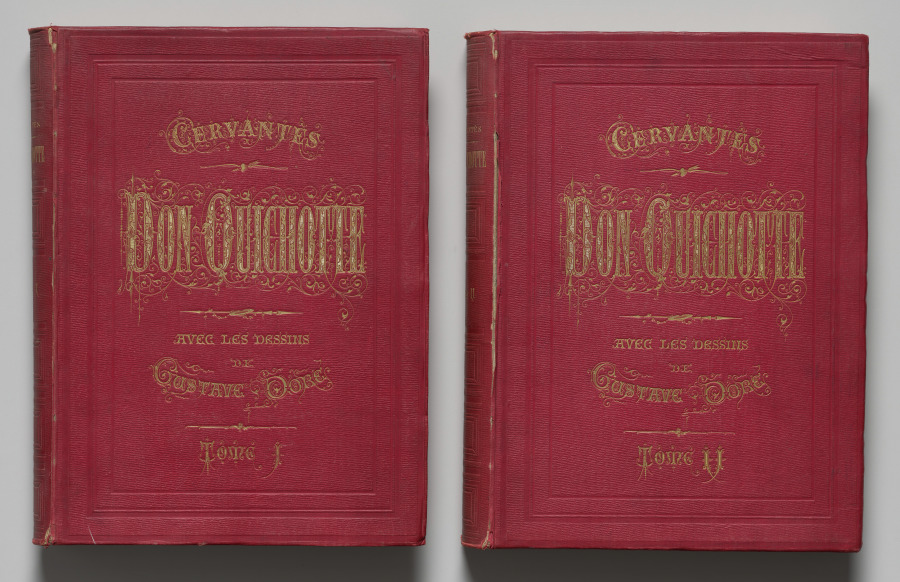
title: Don Quixote, Vols. I-II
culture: France, 19th century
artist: Héliodore Pisan (French, 1822–1890)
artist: after Gustave Doré (French, 1832–1883)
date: 1863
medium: wood engraving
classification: Bound Volume